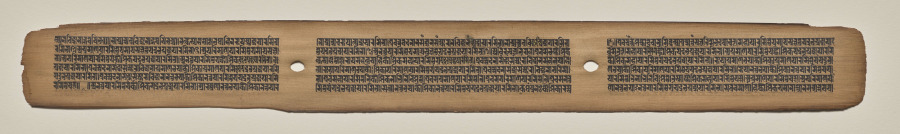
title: Text, Folio 16 (recto), from a Manuscript of the Perfection of Wisdom in Eight Thousand Lines (Ashtasahasrika Prajnaparamita-sutra)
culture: Eastern India, Bihar, Vikramashila Monastery. Painting: Nepal, Kathmandu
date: Sunday, September 14, 1119 (year 239 of the Newar Samvat in the month of Ashvina)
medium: gum tempera and ink on palm leaves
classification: Painting